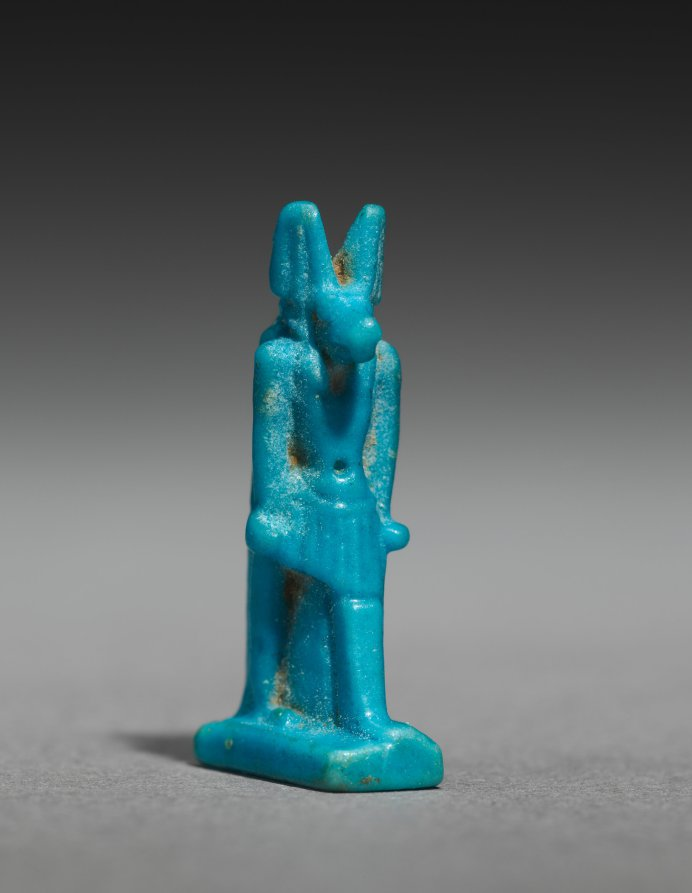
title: Amulet of Anubis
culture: Egypt, Late period (715–332 BCE), Dynasties 27–31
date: 525–332 BCE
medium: turquoise faience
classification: Amulets